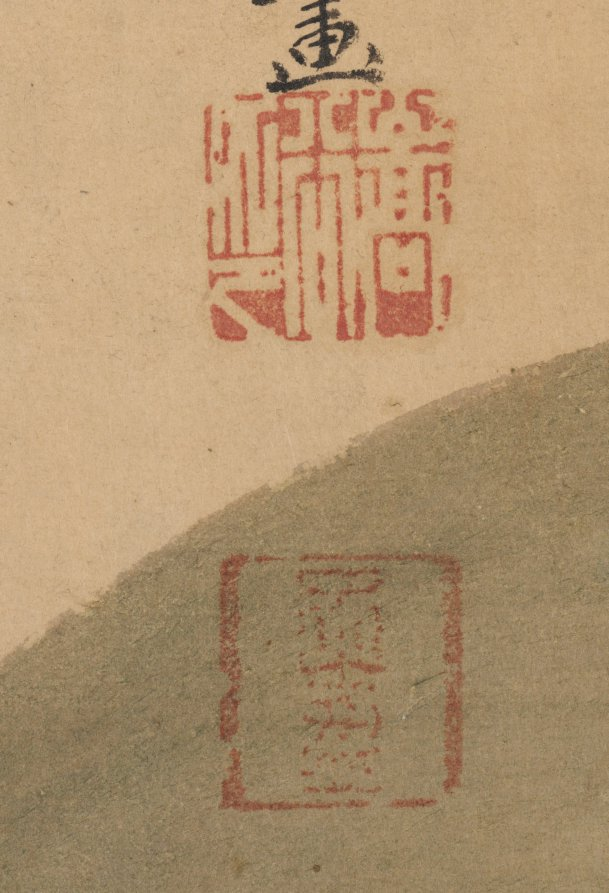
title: Spring and Autumn Farming (Spring)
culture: Japan, Edo period (1615–1868)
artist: Kō Sūkoku (Japanese, 1730–1804)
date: 1700s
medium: Six-panel folding screen, ink, light color, gold, and silver on paper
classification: Painting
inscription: Signature of the artist: "Enrin san jin Rakushisai ko Sukoku ga" (each screen)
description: These screens present the cycle of the farming year, starting with spring at right and ending with fall at left. Close examination of these screens reveals moments of games and amusement, the enjoyment of meals as well as intellectual and spiritual pursuits interspersed among the scenes of cultivating and preparing the rice harvest. The artist Kō Sūkoku is considered the 18th-century heir in style and attitude to Hanabusa Itchō (1652–1724). Itchō’s work incorporated elements from Kano school, ukiyo-e, and literati styles of painting. Kō trained with one of Hanabusa’s pupils, Sawaki Sūshi, who was best known for scenes depicting everyday life and customs.